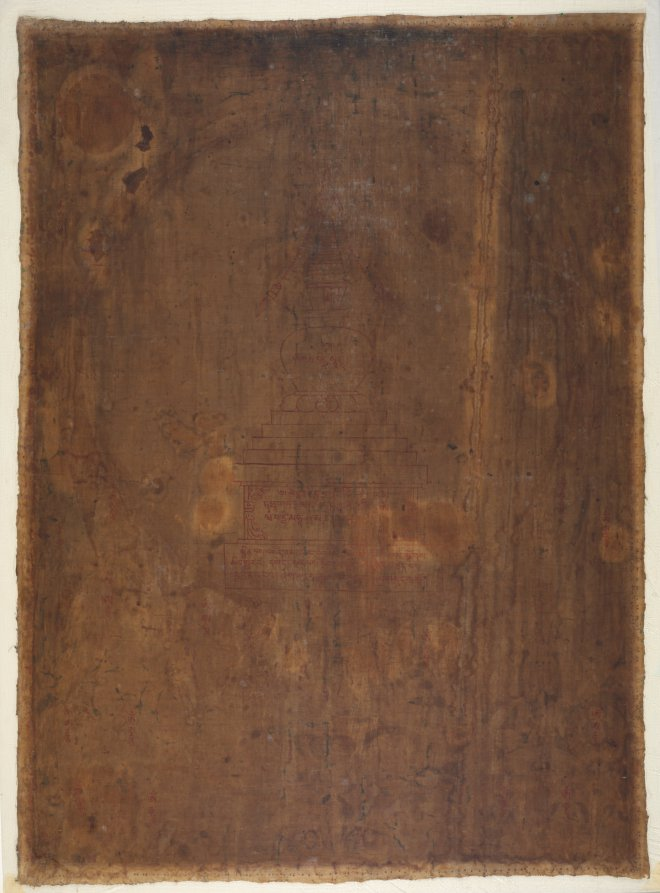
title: Eleven-Headed, Thousand-Armed Bodhisattva of Compassion (Avalokiteshvara)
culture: Western Tibet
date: c. 1500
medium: Gum tempera and ink on cotton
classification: Painting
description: One thousand arms surround the central figure like a radiating halo. Each hand has an eye in the palm to see the suffering of all beings, generating the sense of compassion that this figure embodies. The special form of the central image of the bodhisattva Avalokiteshvara derives from the mystic vision of a nun named Gelongma Palmo, who was born a Kashmiri princess, but prayed for leprosy to avoid having to marry and became an accomplished nun. While meditating in a cave, she achieved this vision of 11-headed, 1,000-armed Avalokiteshvara, who cured her leprosy and guided her on the path to enlightenment.